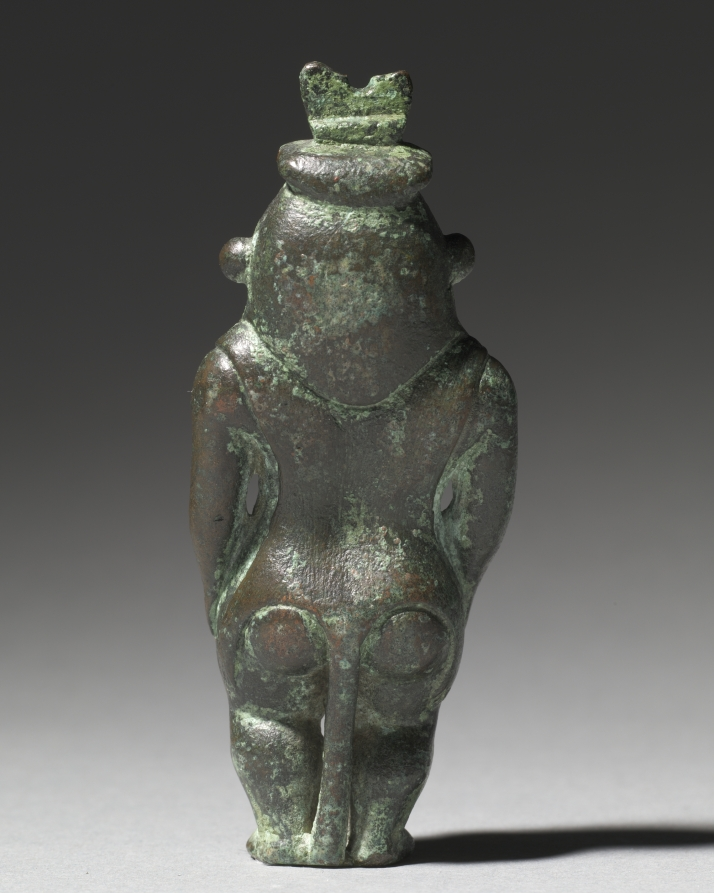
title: Statuette of Bes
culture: Egypt, Late period (715–332 BCE), Dynasty 27 or later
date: 525–30 BCE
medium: bronze, solid cast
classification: Sculpture